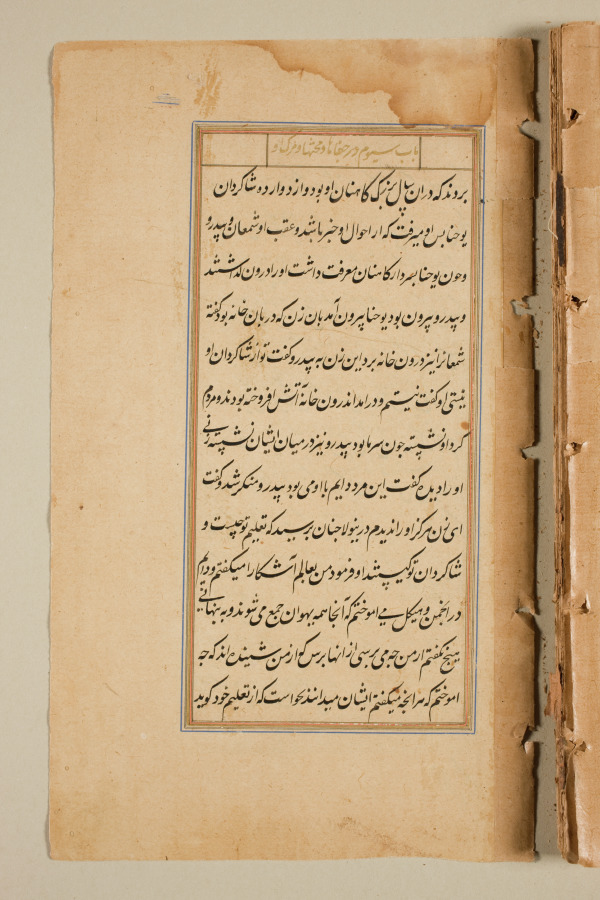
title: Text page from a Mirror of Holiness (Mir’at al-quds) of Father Jerome Xavier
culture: Mughal India, Allahabad, made for Prince Salim (1569–1627)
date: 1602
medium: Ink and gold on paper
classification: Manuscript